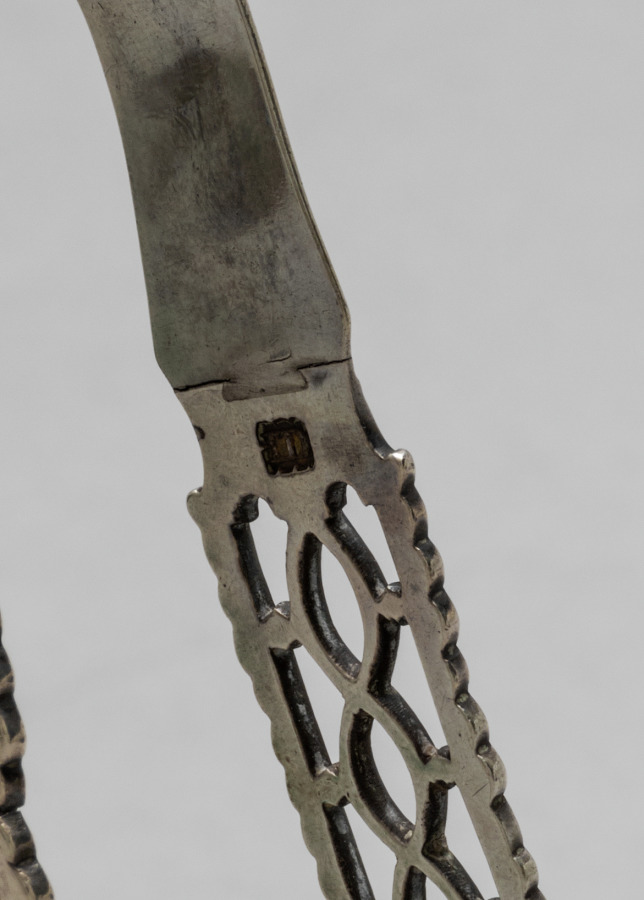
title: Sugar Tongs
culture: England, 18th century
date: 1775–1799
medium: silver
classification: Silver